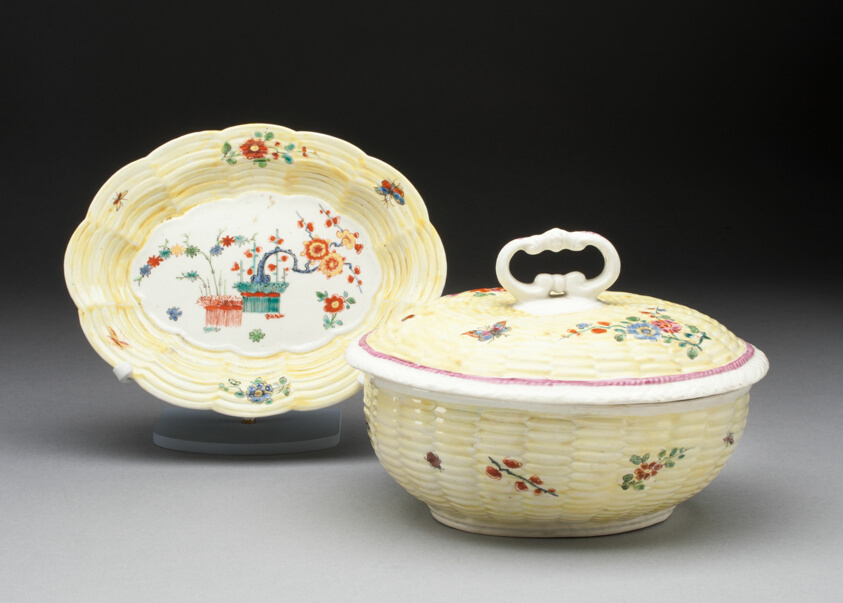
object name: Ceramics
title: Sauce Tureen and Stand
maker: Worcester Porcelain Factory (Warmstry House Period, 1751–1783); Worcester, England, founded 1751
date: 1753/54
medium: Soft-paste porcelain with polychrome enamels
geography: Worcester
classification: tableware; ceramics; porcelain; european decorative arts